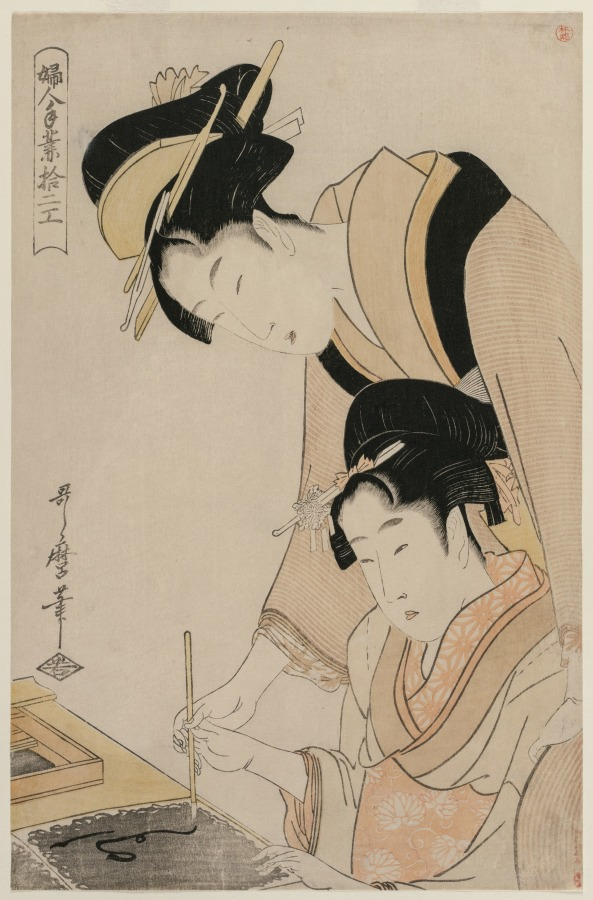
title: Mother Teaching her Daughter Calligraphy, from the series, Twelve Occupations of Women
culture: Japan, Edo period (1615–1868)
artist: Kitagawa Utamaro (Japanese, c. 1754–1806)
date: c. 1798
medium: color woodblock print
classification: Print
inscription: Artist's signature: Utamaro hitsu.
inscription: Publisher: Wakasaya Yoichi (Waka)